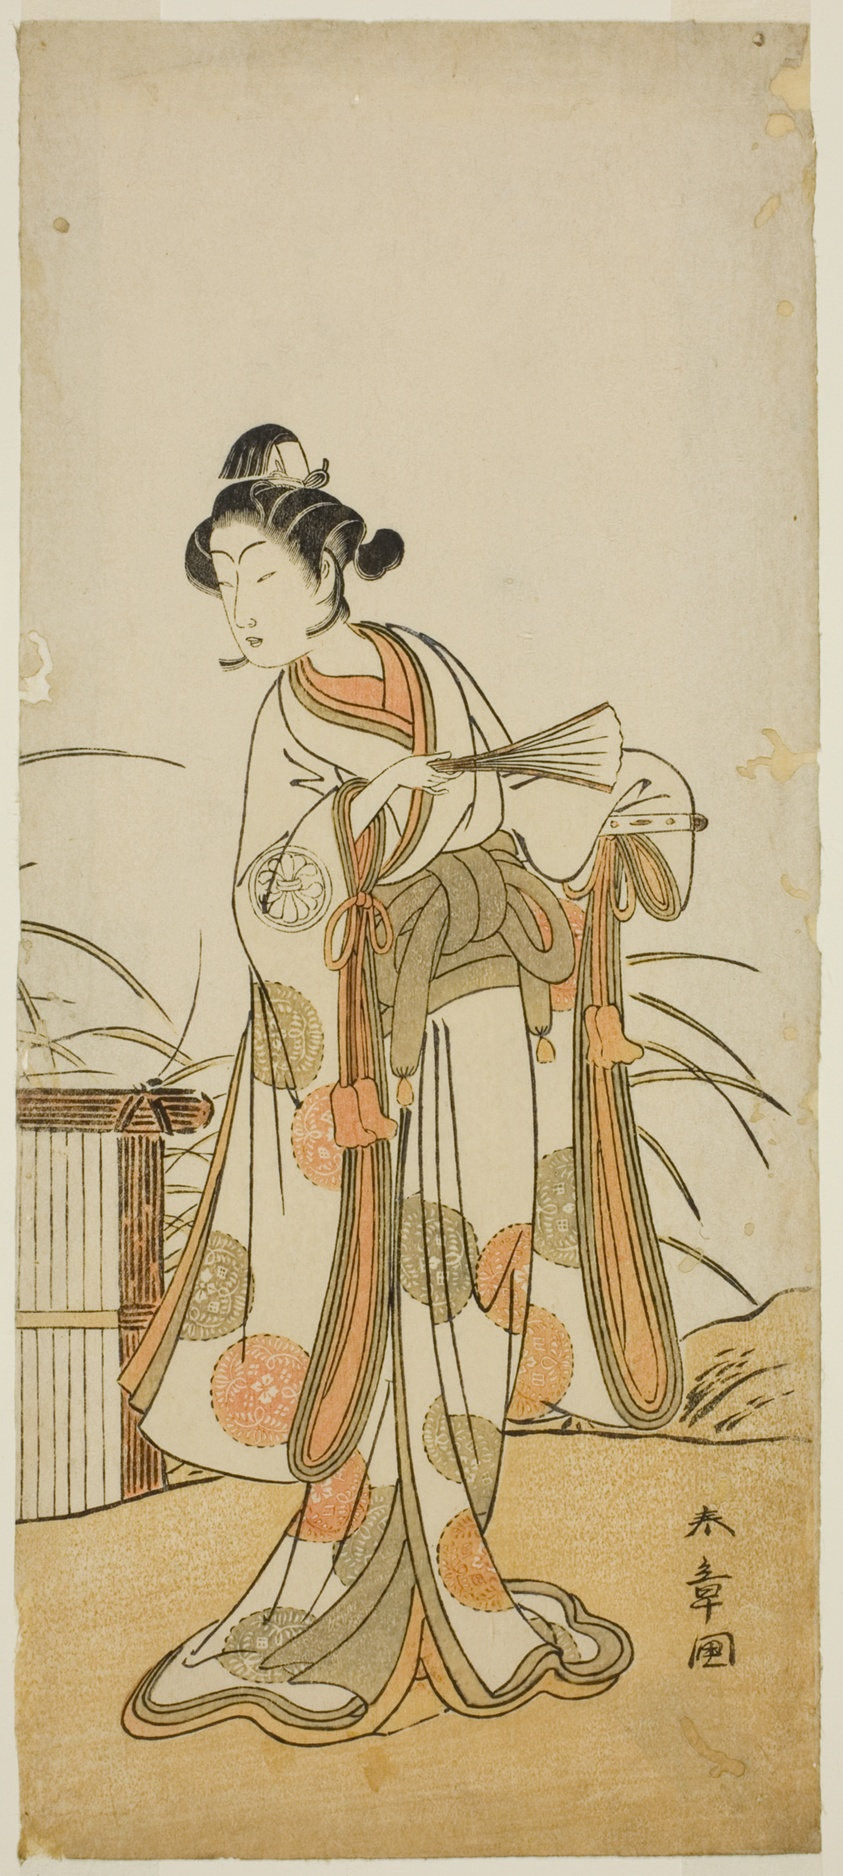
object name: Print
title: The Actor Segawa Kikunojo III as Aigo no Waka in the Play Chigo Sakura Jusan Kane, Performed at the Ichimura Theater in the Eleventh Month, 1774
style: Japanese (culture or style)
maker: Katsukawa Shunsho 勝川 春章; Japanese, 1726-1792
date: c. 1774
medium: Color woodblock print; hosoban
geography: Japan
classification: woodblock print; print; asian art